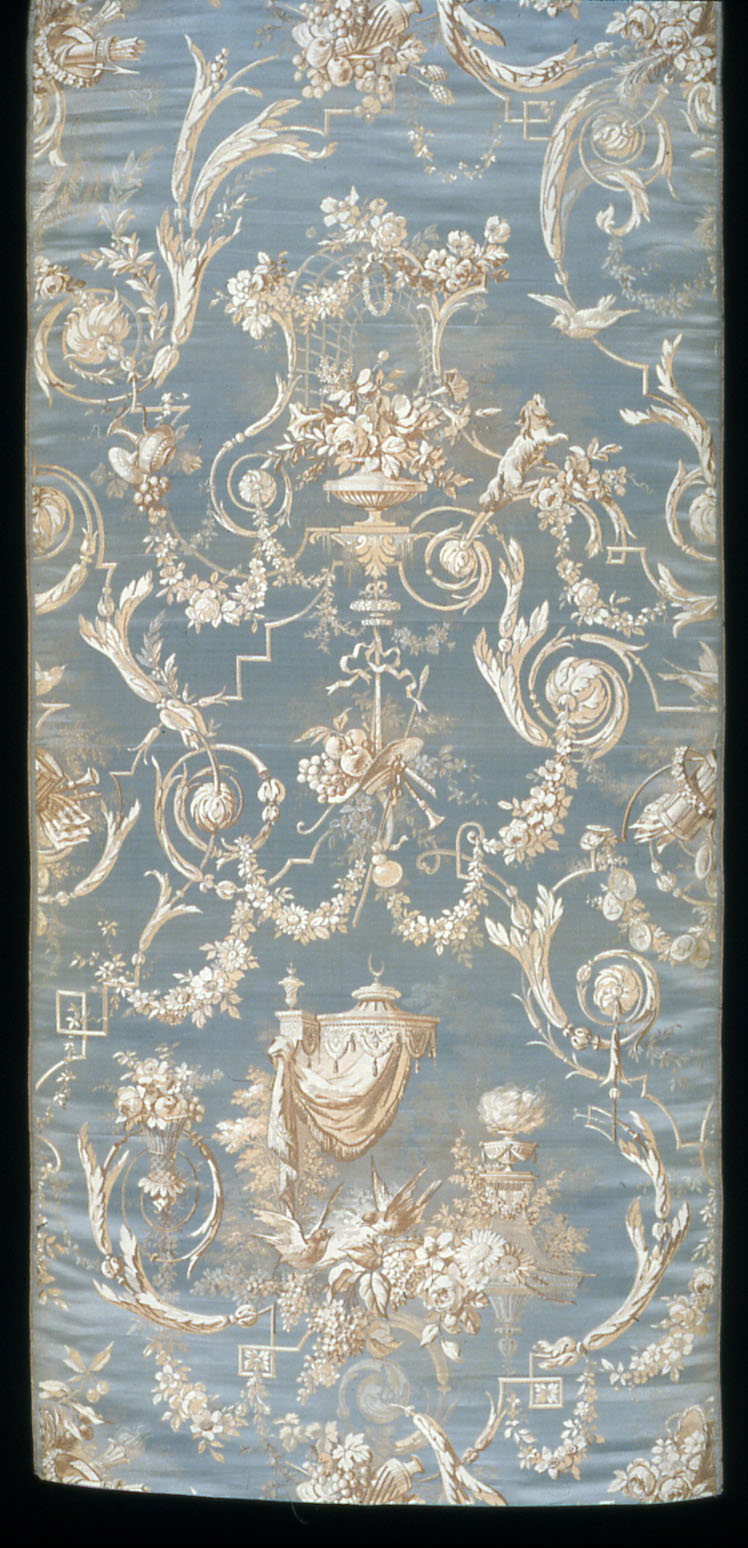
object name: Textile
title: Panel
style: chinoiserie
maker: Produced by Mathevon et Bouvard, 1810–1895; France, Lyon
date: 1860/80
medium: Silk, warp-float faced 4:1 satin weave with plain and 1:3 'S' or weft-float faced 3:1 twill interlacings of secondary binding warps and supplementary patterning wefts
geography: France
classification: textile; weaving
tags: Floating Gardens, flowers, foliage, swags